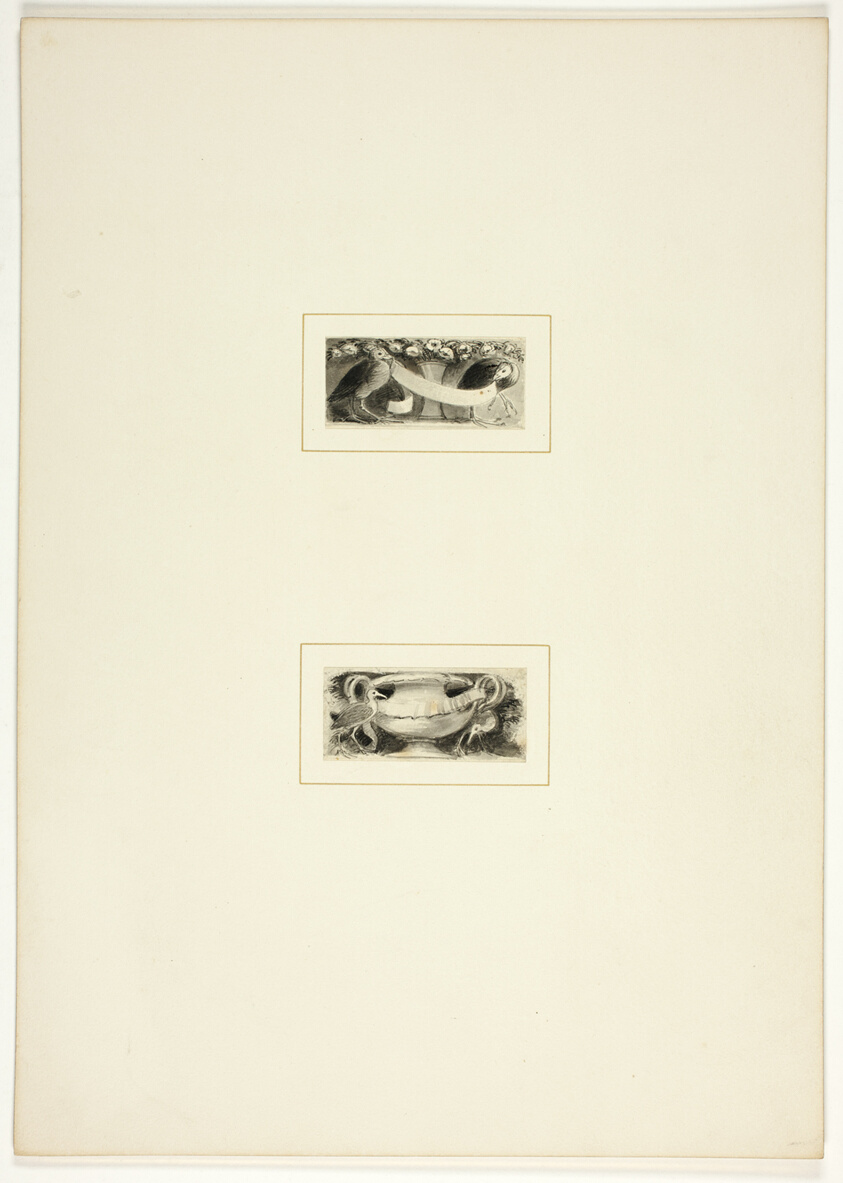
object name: Drawing and Watercolor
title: Study for a plate from The Triumphs of Temper, in the 1796 Royal Engagements Pocket Book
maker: Thomas Stothard (English, 1755-1834)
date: c. 1795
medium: Ink wash on paper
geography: England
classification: ink or chalk wash; drawings (visual works); prints and drawing